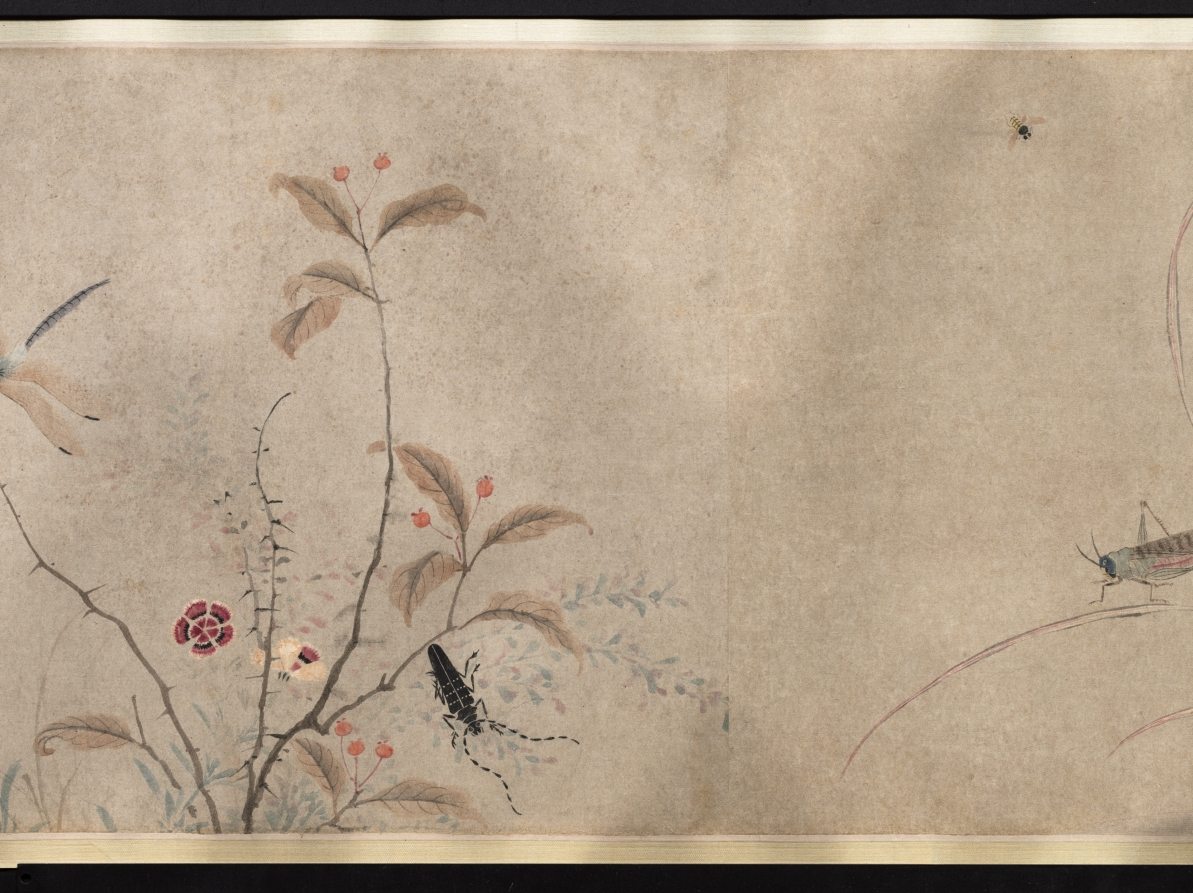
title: Insects and Flowers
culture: China, Qing dynasty (1644-1911) or Republican period (1912-49)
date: c. 1900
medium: Handscroll, ink and color on paper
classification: Painting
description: More than 26 feet long, this scroll presents insects, reptiles, and plants in delicate brushwork and pale colors, referring in style to earlier Southern Song dynasty (1127–1279) bird-and-flower paintings. Upon closer inspection, ants dismember a butterfly and reptiles wait to ambush their prey. An inscription at the end of the painting gives us an idea of its meaning: Attributed to the Qing dynasty scholar Zhang Xigeng (張錫庚, 1801–1861), the inscriber relates the work to an earlier painting by Qian Xuan (錢選, c. 1235–before 1307) and further suggests that the painting may allude to the relentlessness of natural selection. By drawing a parallel to tumultuous episodes in Chinese history, the writer might even hint at the domestic rebellions and the aggression of Western powers against China in his lifetime, particularly the Opium Wars (1839–60).